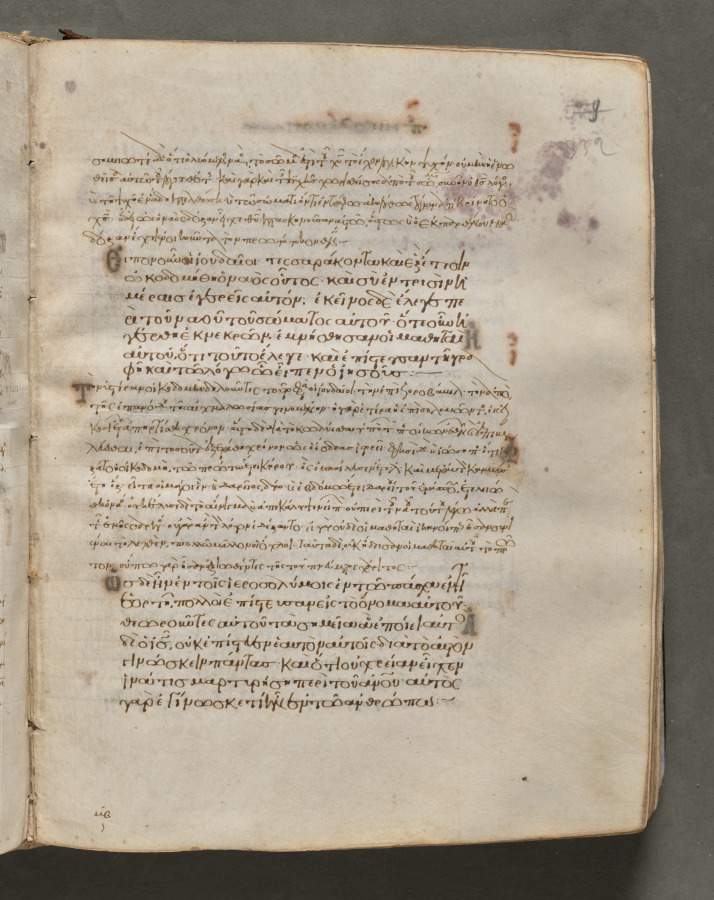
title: Text, folio 332 (recto), from a Gospel Book with Commentaries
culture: Byzantium, Constantinople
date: c. 1000–1100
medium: ink, tempera, and gold on vellum; leather binding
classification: Bound Volume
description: Each of the four gospels in this book opens on a page with brilliantly illuminated borders depicting the author of the text as well as birds—principally peacocks, symbols of the immortality of the soul—and fountains, representing the fountain of life and the salvation of the soul. This volume consists of 428 leaves with texts in Greek. Its level of sophistication suggests that it was probably written and decorated in a monastery in Constantinople.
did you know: Gospel books were carried in procession through Byzantine churches.